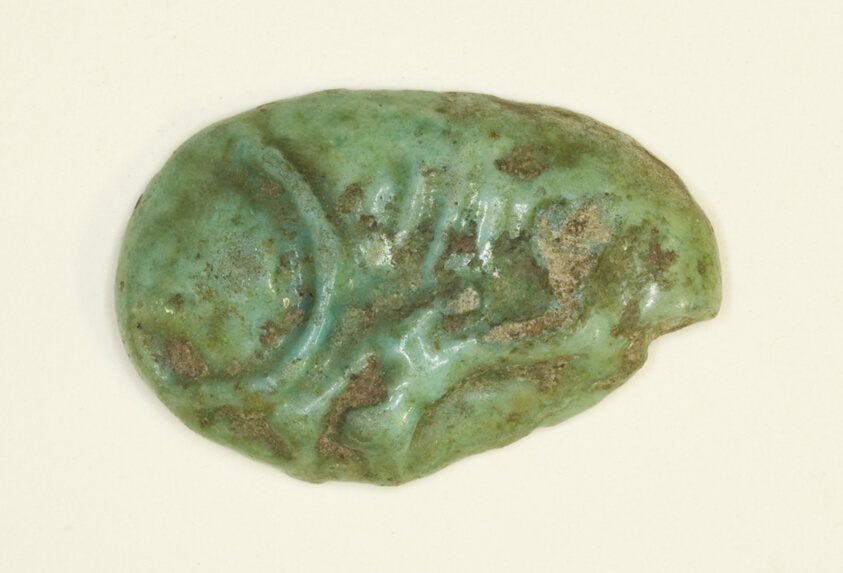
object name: Costume and Accessories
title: Foundation Deposit: Bound Ox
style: new kingdom, nineteenth dynasty, eighteenth dynasty, egyptian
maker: Egyptian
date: New Kingdom, Dynasties 18–19 (about 1550–1069 BCE)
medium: Faience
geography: Egypt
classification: amulet; ancient art; votive offering; mummy goods; costume; faïence (composite material)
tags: cows, sacrifice, animals